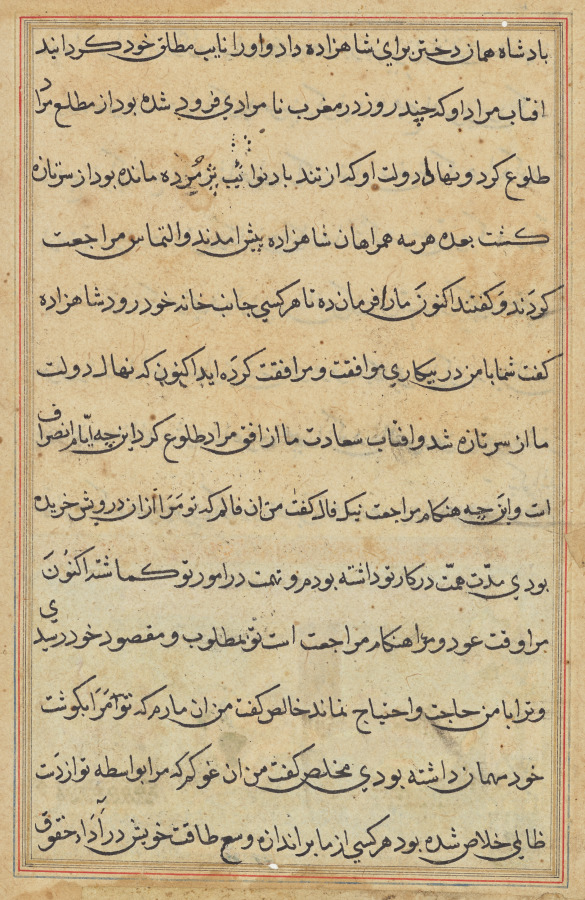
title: Page from Tales of a Parrot (Tuti-nama): text page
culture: Mughal India, court of Akbar (reigned 1556–1605)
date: c. 1560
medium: gum tempera, ink, and gold on paper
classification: Painting